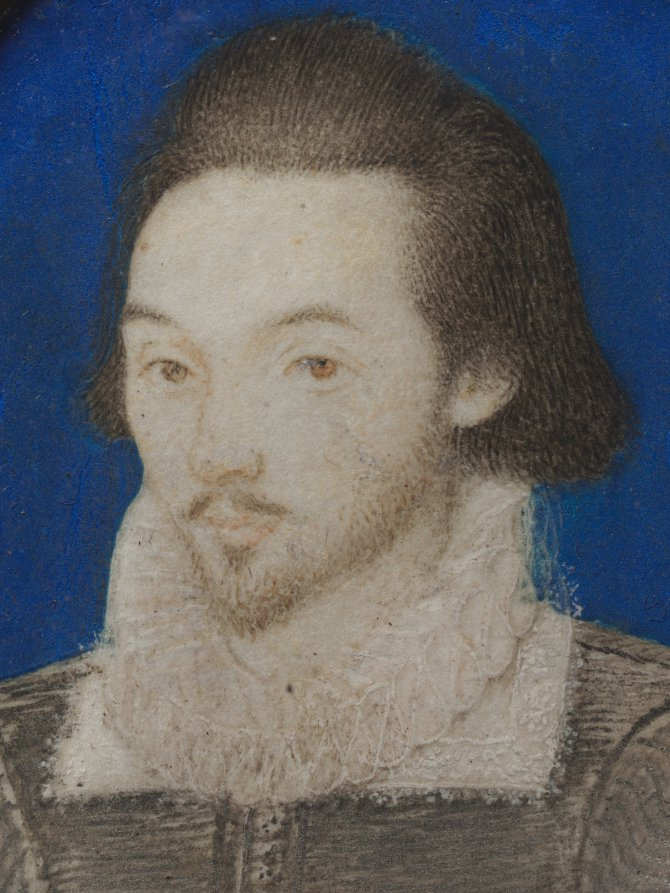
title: Portrait of a Man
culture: England, 17th century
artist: manner of Nicholas Hilliard (English, c. 1547–1619)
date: c. 1600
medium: watercolor on vellum with a gold border in a gilt metal frame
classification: Portrait Miniature